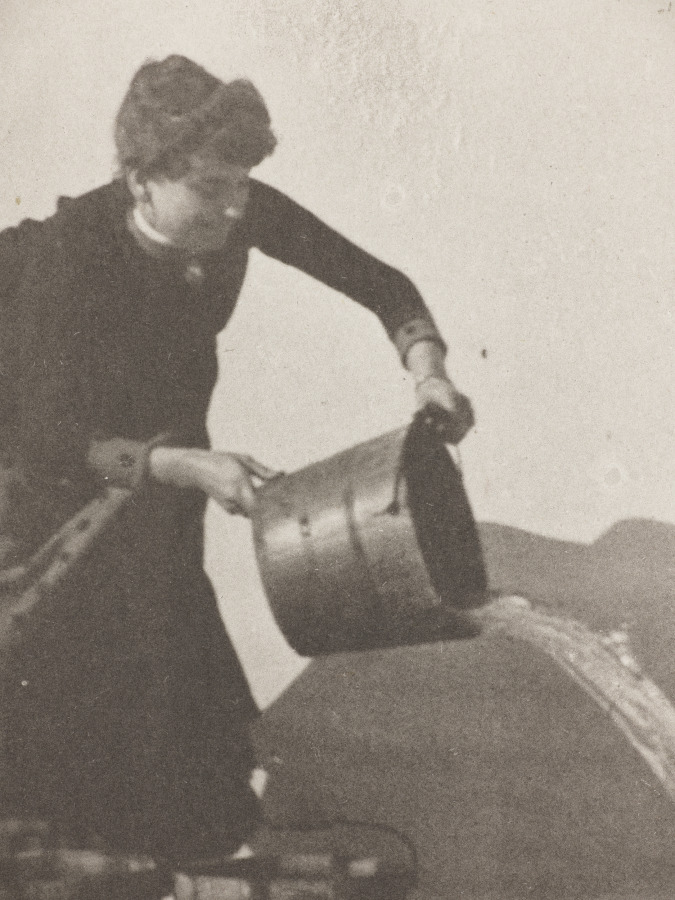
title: Emptying a Bucket of Water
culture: America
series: Animal Locomotion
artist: Eadweard J. Muybridge (American, 1830–1904)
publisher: University of Pennsylvania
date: 1887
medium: collotype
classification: Photograph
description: Eadweard J. Muybridge initially used horses to capture motion as separate slices of time faster than the human eye could perceive them, then moved on to study other animal and human movements. Everyday activities, like emptying a bucket of water, were broken down and sequenced back-to-back. This series was commissioned by the University of Pennsylvania and intended to diagnose dysfunction in human movement by allowing each consecutive action to be studied in isolation. The university’s desire for distribution called for the use of collotype. The process had been recently improved to the point where editions of up to 1,000 were possible, making it an attractive option for publishers.